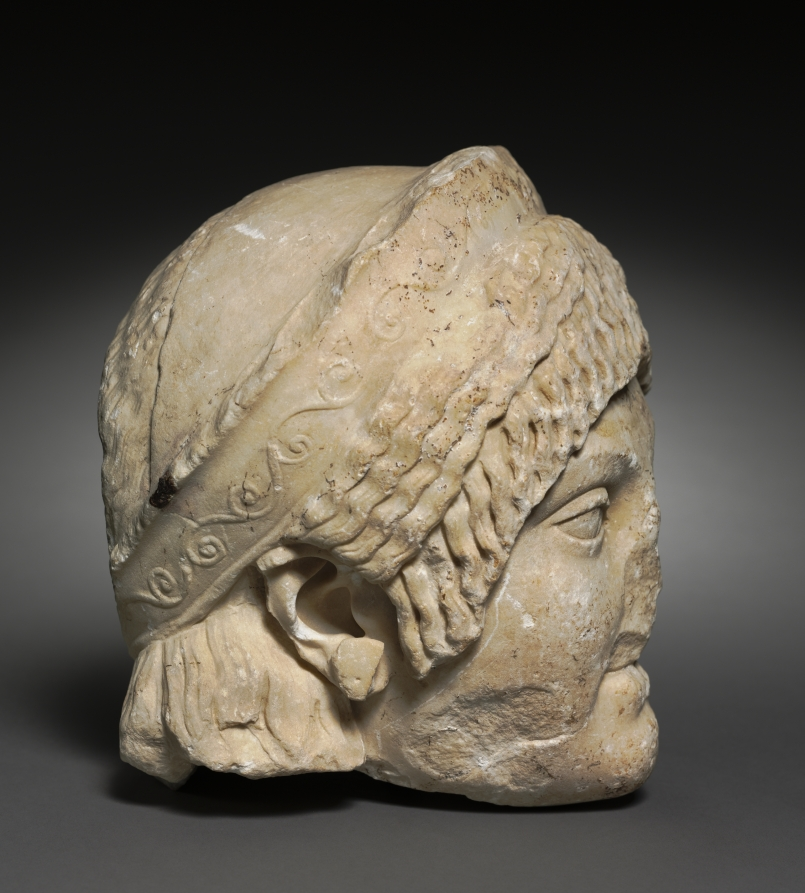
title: Head of a Young Woman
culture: Italy, Roman (archaizing)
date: 25–1 BCE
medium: marble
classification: Sculpture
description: This head of a young woman is designed after Greek art in the Archaic period (c. 600–480 BCE). She references a type of Greek statue called a kore in her heavily patterned hair, almond-shaped eyes, neutral expression, and large disk earrings, best preserved on the right ear. Her stephane or diadem crown is from the later Hellenistic period; however, with the addition of the decorative vegetal scroll it is characteristic of Roman art. All these elements together are not found in original Greek archaic artworks. This ancient combination of deliberately historic styles is called archaizing or archaistic by modern scholars.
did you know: When Rome conquered Greece in 146 BCE, Romans developed a taste for historic Greek art.